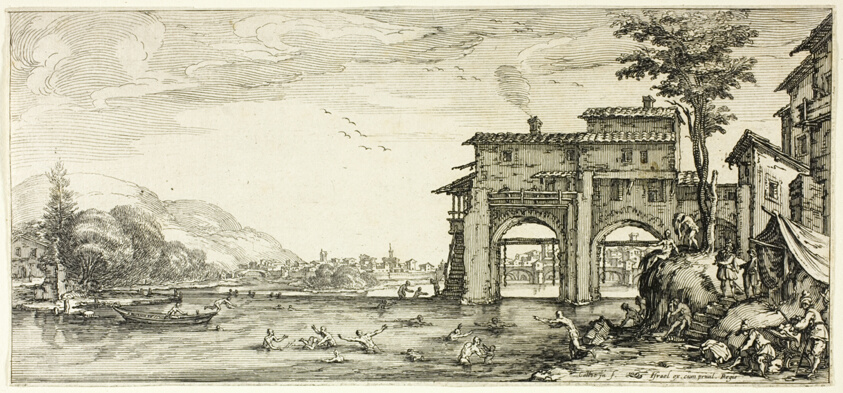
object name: Print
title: The Bathers, from Various Scenes Designed in Florence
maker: Jacques Callot (French, 1592-1635)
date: 1618–20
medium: Etching on paper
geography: France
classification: etching; print; prints and drawing